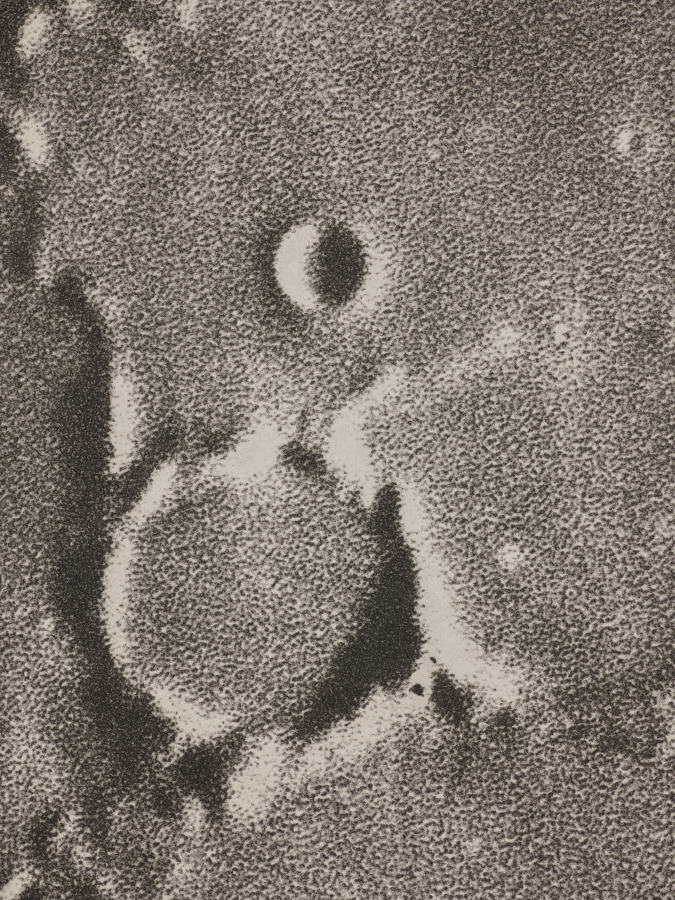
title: Photographie Lunaire: Copernic-Képler-Aristarique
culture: France, 19th century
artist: Maurice Loewy (French, 1833–1907)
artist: Pierre Henri Puiseaux (French, 1855–1928)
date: 1896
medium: photogravure (heliogravure)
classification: Photograph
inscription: Imprinted in black type on recto of photo paper: "Grand Equatorial Coude" Imprinted in black type on recto of photo paper: "1896. 29 Septembre 16 h O.tin.Paris Agrandissement 8.75 Diametre Lunaire 1 m 43" Imprinted in black type along each edge: "1-9" Imprinted in black type on gallery label on verso: "Fraenkel Gallery/49 GEARY STREET SAN FRANCISCO 94108/FURTHERMORE/[30TH Anniversary Exhibition]/Fraenkel Gallery/April 22-June 26, 2010" Imprinted in black type on gallery label on verso: "Fraenkel Gallery/49 GEARY STREET SAN FRANCISCO 94108/LOEWY & PUISEUX/Photographie Lunaire: Copernie-Kepler-/Aristarique, Septembre 29, 1896 heliogravure/22-1/2 x 18-3/4 inches (image)/29-1/2 x 22 inches (sheet)/Plate XVI/[LP.0302.Z]"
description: This plate is from a deluxe 12-volume atlas of the moon created by astronomers Maurice Loewy and Pierre Henri Puiseaux. The atlas remained the most accurate reference of the moon’s surface until the age of space travel. The duo captured thousands of images at the Paris Observatory through a telescope that Loewy invented. It was equipped with a mechanism that tracked the moon’s movements during the exposures. Given weather conditions, they were only able to photograph 50 to 60 nights per year; the project thus took 15 years to complete and contained nearly 100 large-scale photogravures.